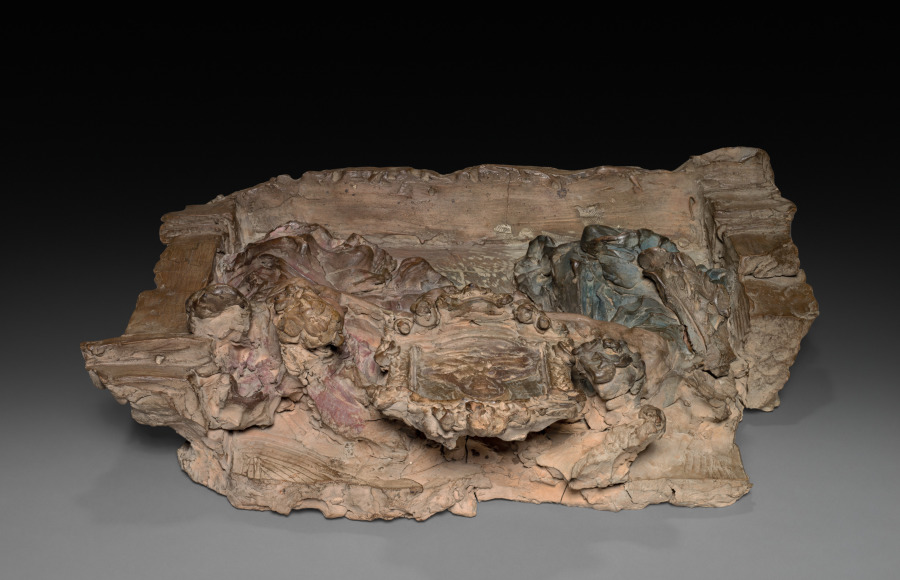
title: Two Angels and Cherubs Bearing an Icon of Christ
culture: Italy, Rome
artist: probably by Paolo Naldini (Italian, 1616–1691)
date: c. 1670–80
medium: terracotta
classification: Sculpture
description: This work is probably a study for a large altarpiece that would have combined several materials, including marble, stucco, and paint. The artist modeled his design in soft clay, which was then hardened by firing; subtle tints suggest the richness of the finished work. The idea of using sculptural figures to support a painted image within an altarpiece was influenced by the work of the Roman sculptor Gian Lorenzo Bernini (1598–1680), with whom Naldini is known to have worked.